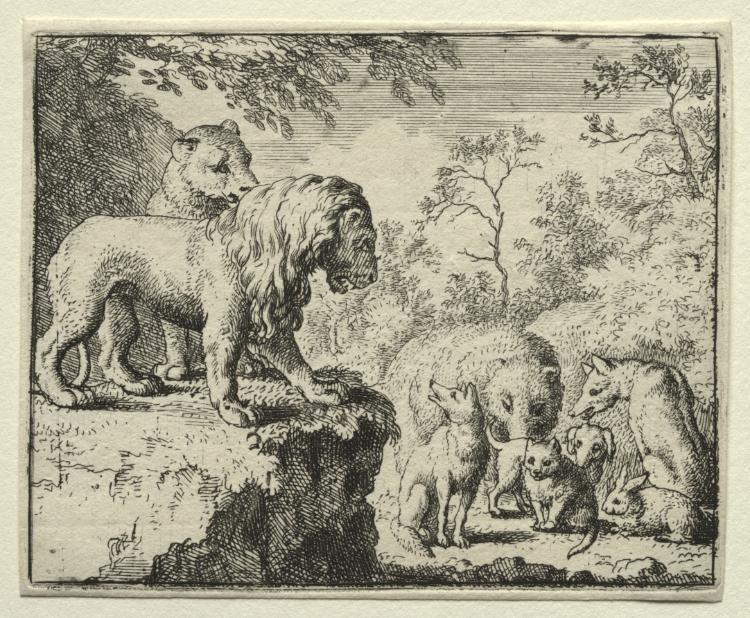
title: Reynard the Fox: The Pardon of Reynard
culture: Netherlands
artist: Allart van Everdingen (Dutch, 1621–1675)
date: 1650–75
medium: etching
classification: Print